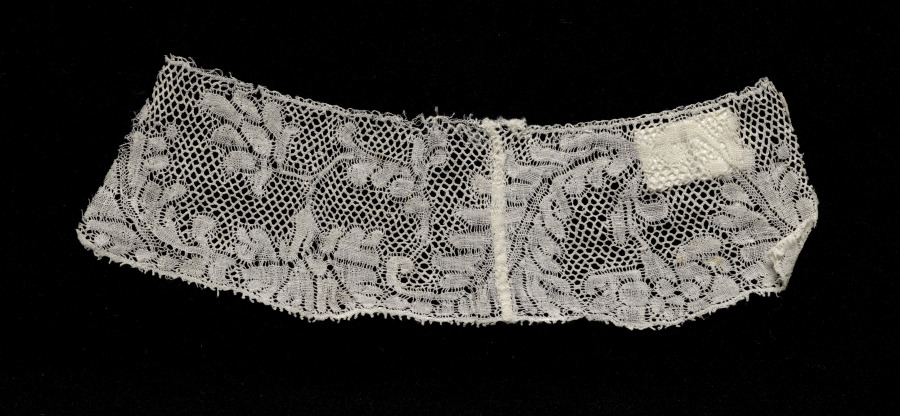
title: Lace Edging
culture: France, Valenciennes or Flanders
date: 1700s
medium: Linen: bobbin lace (Valenciennes)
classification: Lace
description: This lace fragment, with its design of floral motifs, is a duplicate of 1936.138.